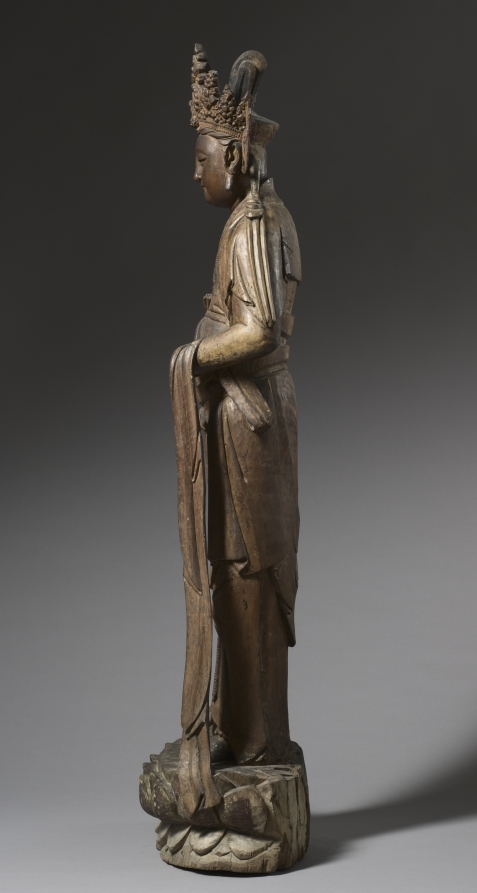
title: Standing Guanyin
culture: China, Southern Song dynasty (1127–1279)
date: 1127–1279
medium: wood with traces of gesso, polychromy and gilding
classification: Sculpture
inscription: Inscribed on scarf end: [for] our mentor Yüan-sheng [from] abbot-priest Ch'eng-lang, disciple Chin-yen, and second-generation disciple Wu-huai (trans. Wai-kam Ho)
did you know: This bodhisattva Guanyin was carved from a single block of willow wood.